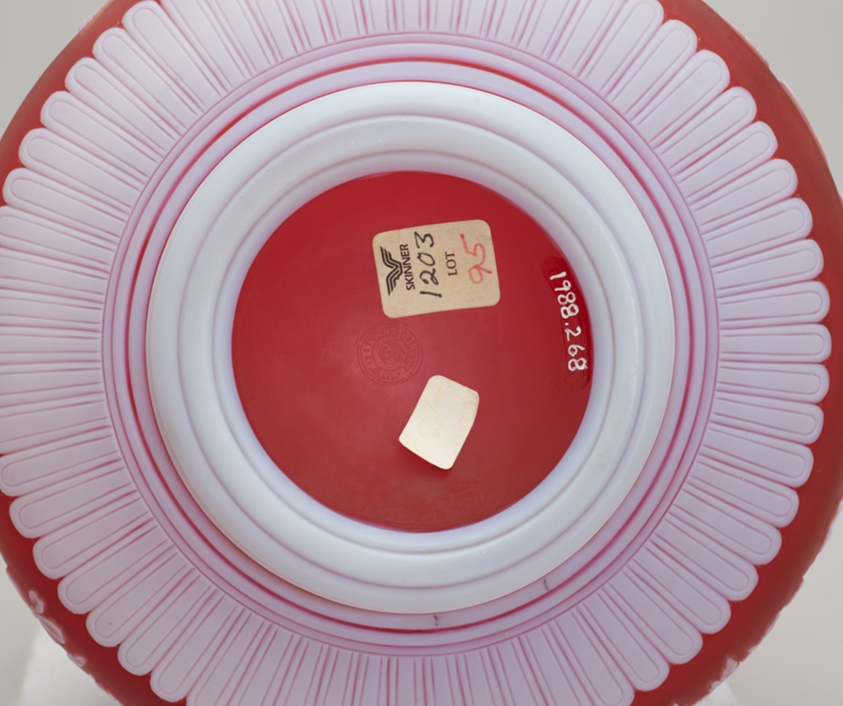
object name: Glass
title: Vase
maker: Made by Thomas Webb and Sons; Stourbridge, England, founded 1837; Carved by George Woodall; English, 1850–1925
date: 1885–90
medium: Blown and cased glass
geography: Stourbridge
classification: vase; vessel; glass; european decorative arts